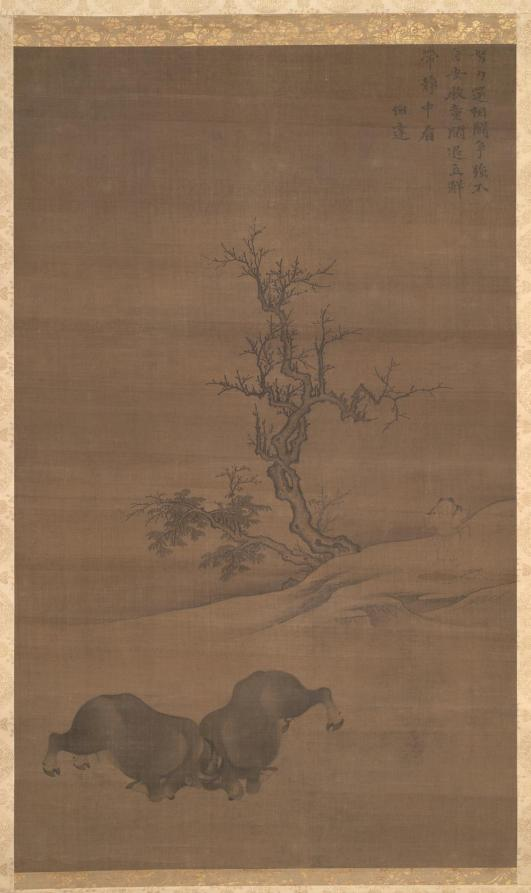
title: Herdboys and Buffalo in Landscape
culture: China, Qixian, Yuan dynasty (1271-1368)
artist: Guo Min (Chinese, mid-late 1200s)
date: 1200s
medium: Hanging scroll; ink on silk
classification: Painting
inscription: 努力還相鬪，爭強不自安。/ 牧童閑退立，解帶靜中看。/ 伯達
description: Herdboys tend their buffalo in a bucolic landscape by a winding stream. Guo Min emphasizes the massive forms and mighty power of the animals, transforming them into forces of nature. The poem on this scroll reads: "The bulls are engaging in fighting, Cautiously, each seeks to overcome the other. The herdboy calmly stands by. Untying his belt, he silently watches."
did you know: Tending water buffalos has traditionally been the task of young boys and can still be seen in rural areas of Southern China today.